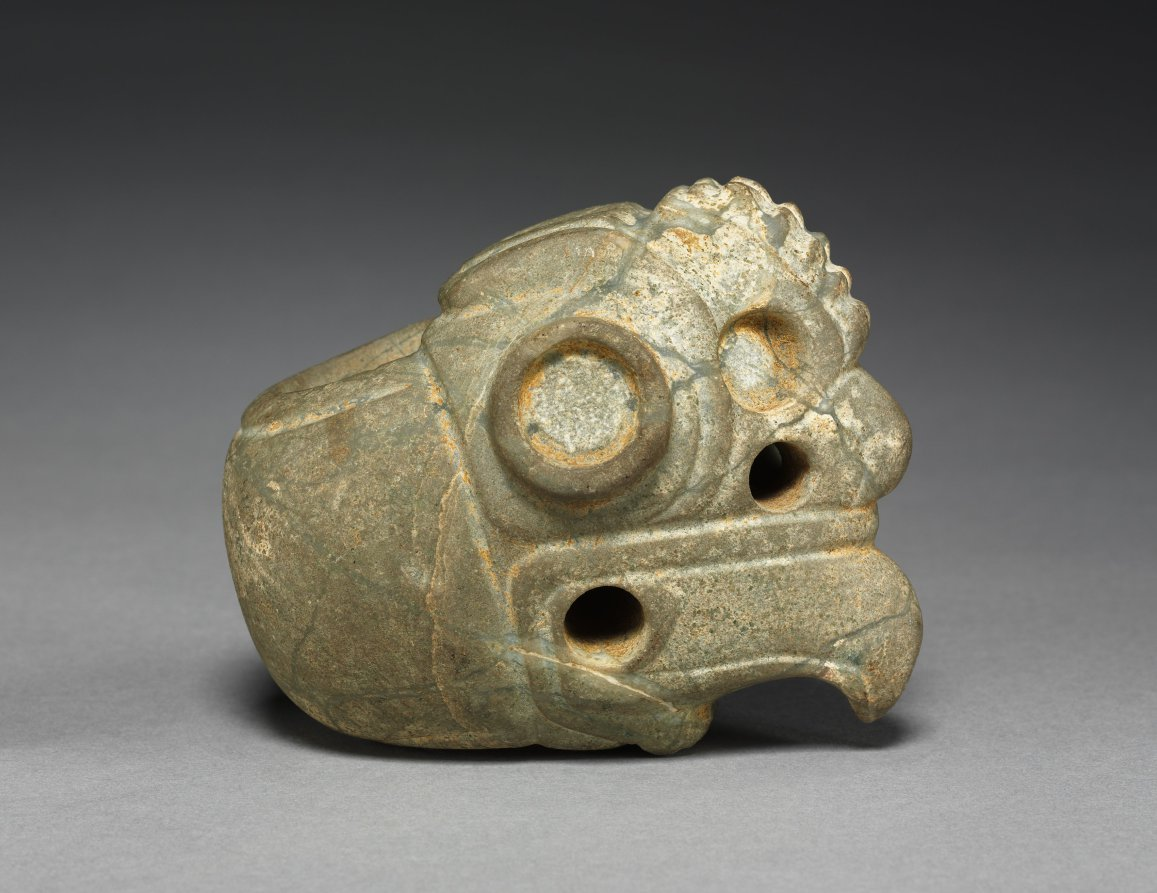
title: Ceremonial Mace (Club) Head: Bird (Male Curassow?)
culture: Costa Rica, Southern Nicoya region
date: 300 BCE–600 CE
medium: stone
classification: Sculpture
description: Probably once mounted on wooden shafts, these objects could have served as symbols of chiefly authority, group insignia, the heads of ceremonial weapons, or all three. They eventually were placed in elite graves. The bird may be a male curassow and the feline, a jaguar.